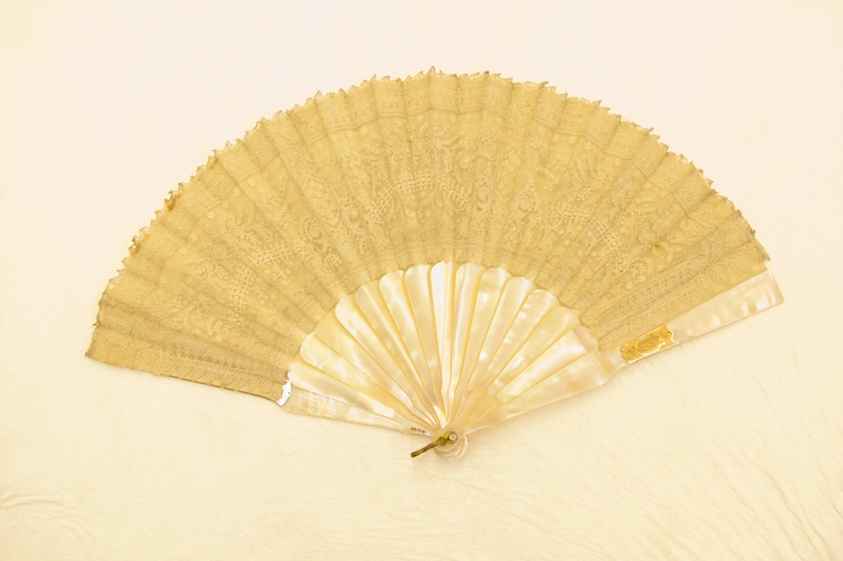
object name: Costume and Accessories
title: Fan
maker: France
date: c. 1870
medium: Etched mother-of-pearl sticks and guards; point de gaze mount; backed with gauze; rhinestone rivet; gilt loop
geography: France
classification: textile; fan - weaving; costume accessory - folding fan; costume accessory; costume